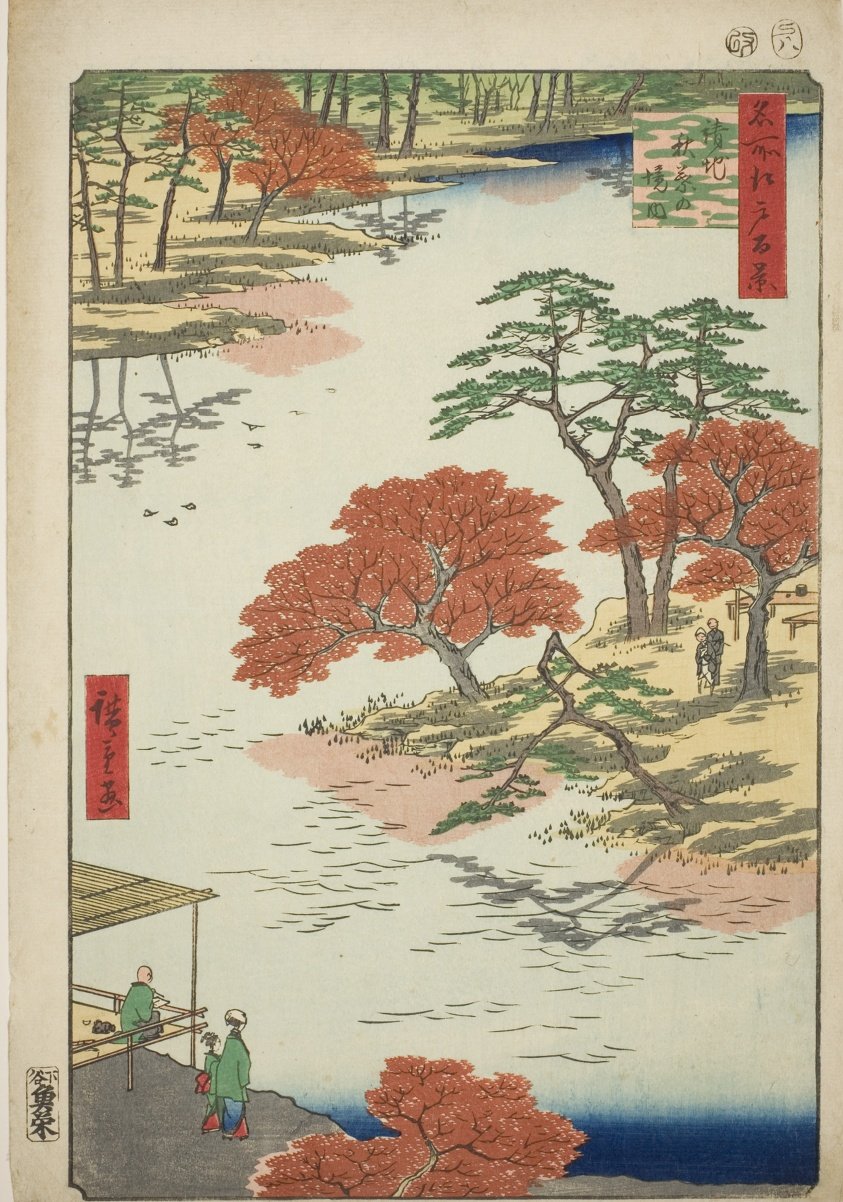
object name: Print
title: Precints of the Akiba Shrine, Ukeji (Ukeji Akiba no keidai), from the series "One Hundred Famous Views of Edo (Meisho Edo hyakkei)"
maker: Utagawa Hiroshige 歌川 広重; Japanese, 1797-1858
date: 1857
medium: Color woodblock print; oban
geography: Japan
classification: woodblock print; print; asian art